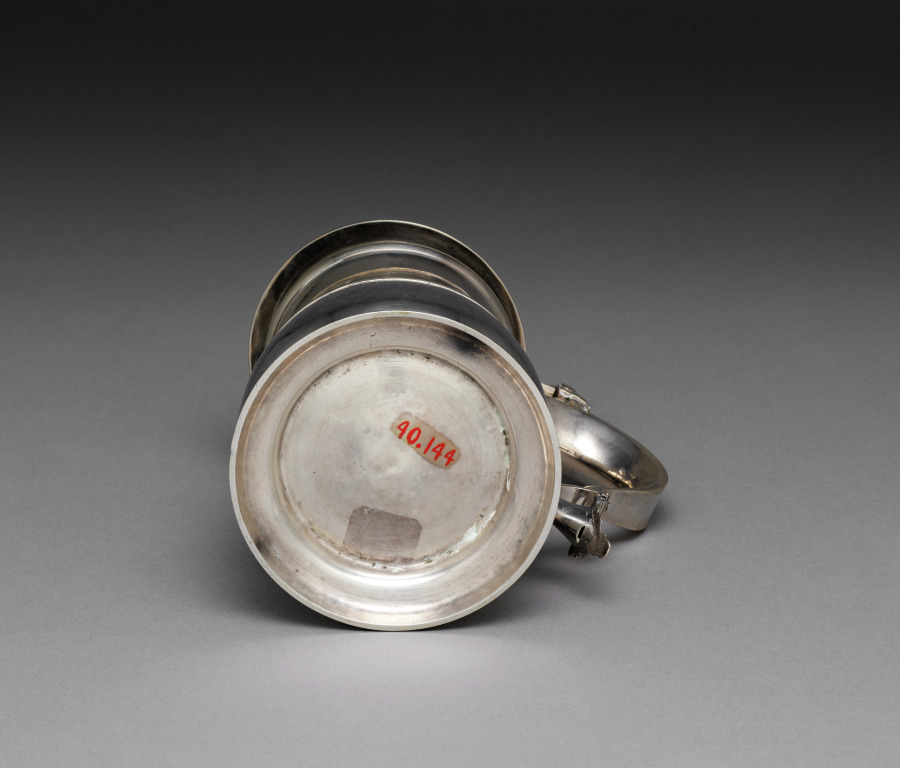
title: Tankard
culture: England, 18th century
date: c. 1760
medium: silver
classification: Silver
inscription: Scratched underside: "11 oz 13 'u 10".